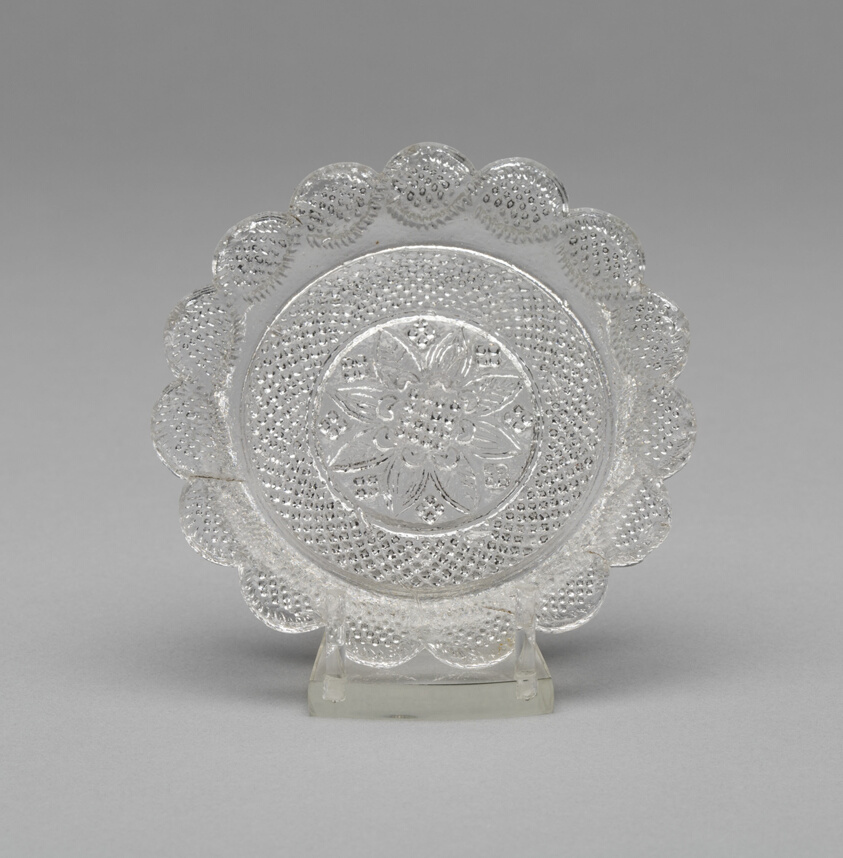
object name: Glass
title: Cup plate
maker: Artist unknown (American, 19th century); New England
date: 1826–35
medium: Pressed glass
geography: New England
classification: plate (general, dish); glass; american decorative arts; american arts; decorative arts